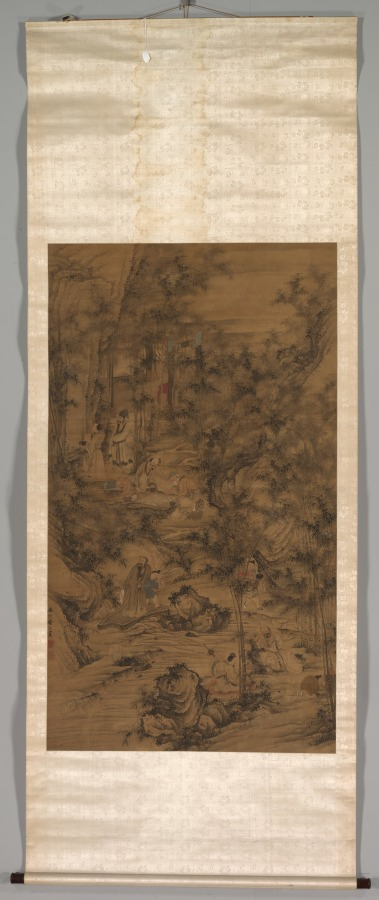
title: The Seven Worthies of the Bamboo Grove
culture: China, Qing dynasty (1644-1911)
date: 1644–1911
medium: hanging scroll, ink and slight color on silk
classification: Painting